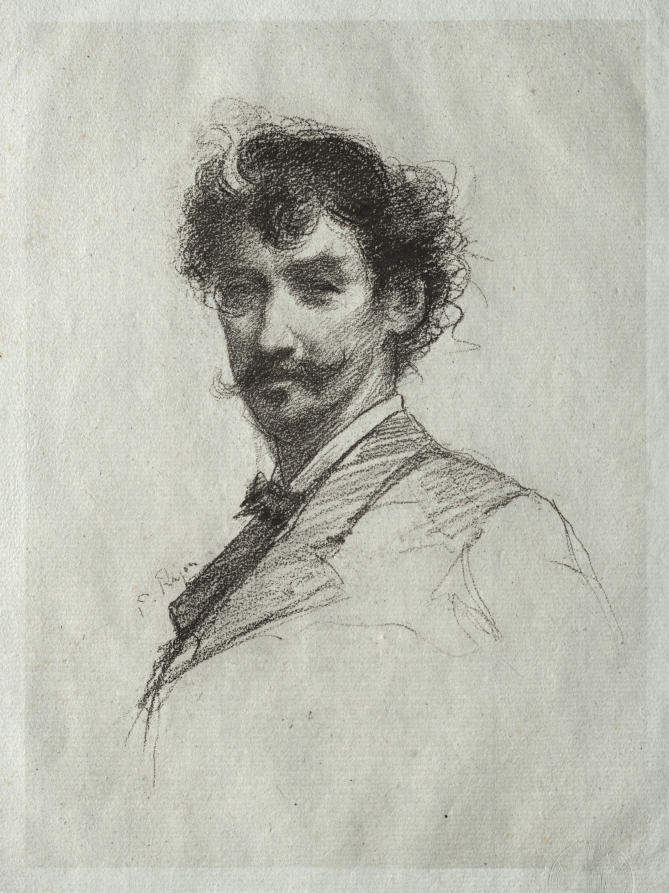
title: James McNeill Whistler with White Lock and Monocle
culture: France, 19th century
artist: Paul Rajon (French, 1842/43–1888)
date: c. 1880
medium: softground etching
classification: Print